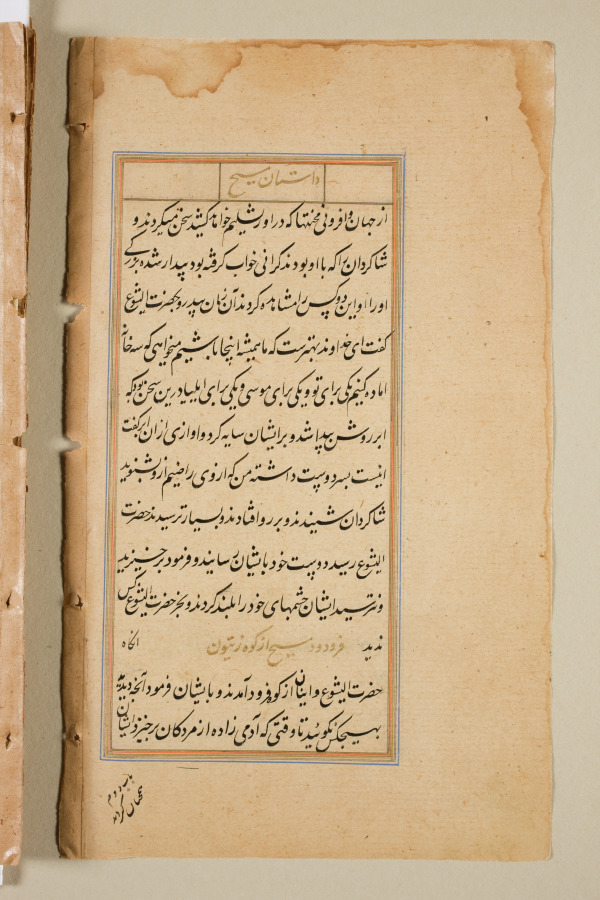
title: Text page from a Mirror of Holiness (Mir’at al-quds) of Father Jerome Xavier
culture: Mughal India, Allahabad, made for Prince Salim (1569–1627)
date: 1602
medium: Ink and gold on paper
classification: Manuscript